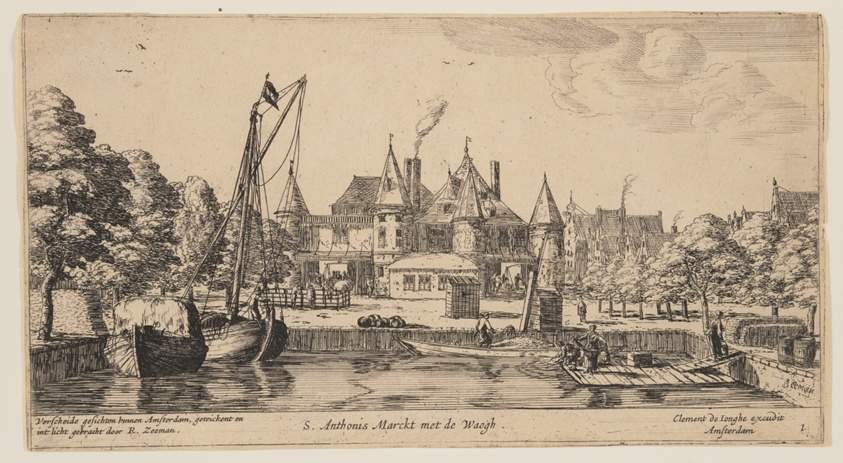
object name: Print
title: S. Anthonis Marckt met de Waegh, from Views of Amsterdam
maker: Reinier Nooms, called Zeeman (Dutch, c. 1623–1664)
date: c. 1660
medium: Etching on ivory laid paper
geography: Netherlands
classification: etching; paper; print; prints and drawing